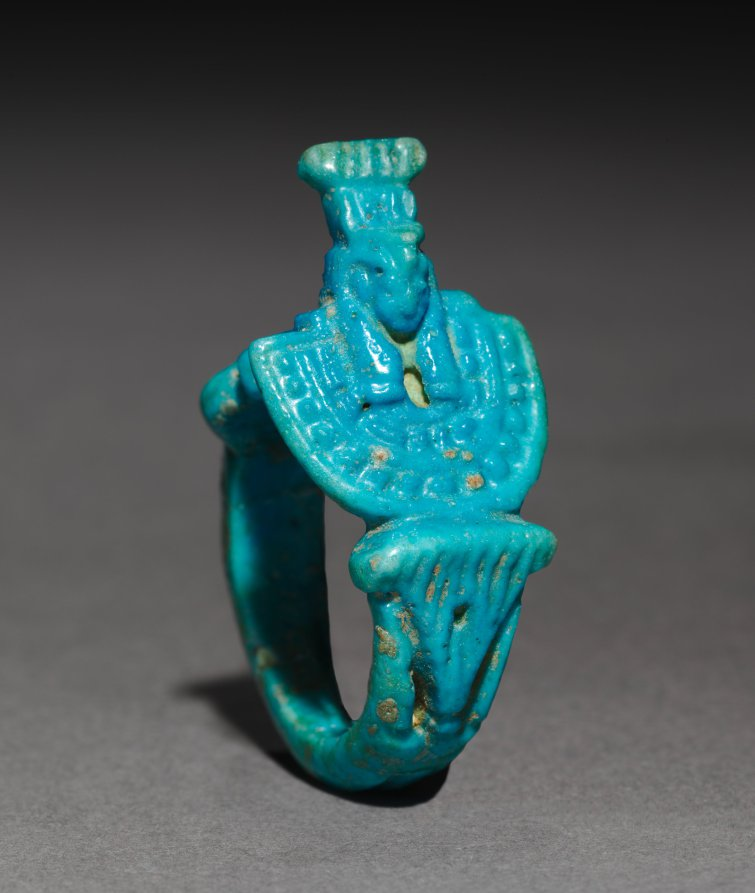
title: Ring with Aegis of Nepthys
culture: Egypt, Third Intermediate (1069–715 BCE), Dynasty 22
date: 945–715 BCE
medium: turquoise faience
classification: Jewelry